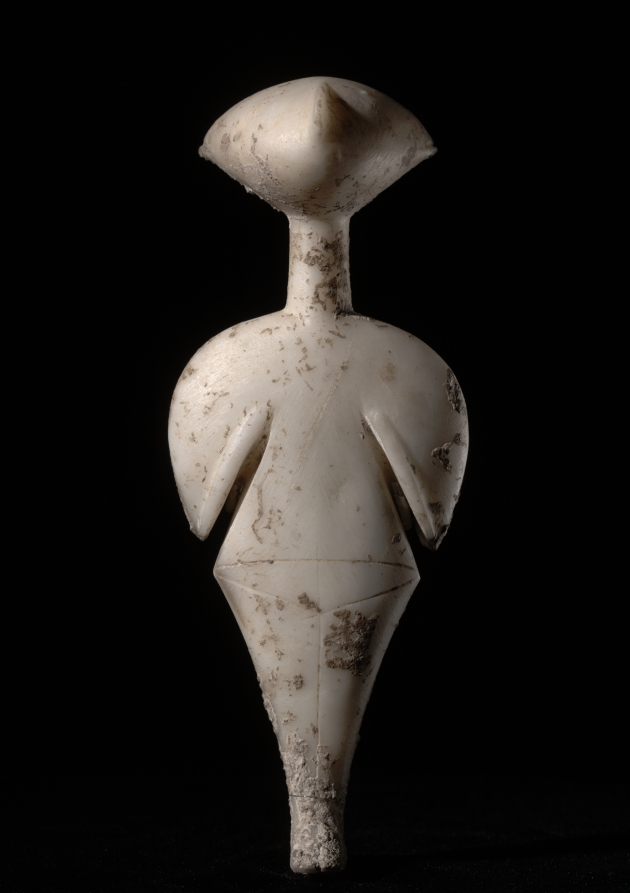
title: Statuette of a Woman: "The Stargazer"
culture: Western Anatolia, early Bronze Age (c. 3300–1200 BCE)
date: c. 3000 BCE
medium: marble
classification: Sculpture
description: "The Stargazer" moniker was given to this diminutive marble sculpture because its upturned head looks toward the heavens. Details carved into the stone are visible while painted features have been lost to time. We do not know how this object was used, but its enigmatic nature invites speculation.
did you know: We can identify this mysterious figure as female by the inscribed pubic triangle below her waist.